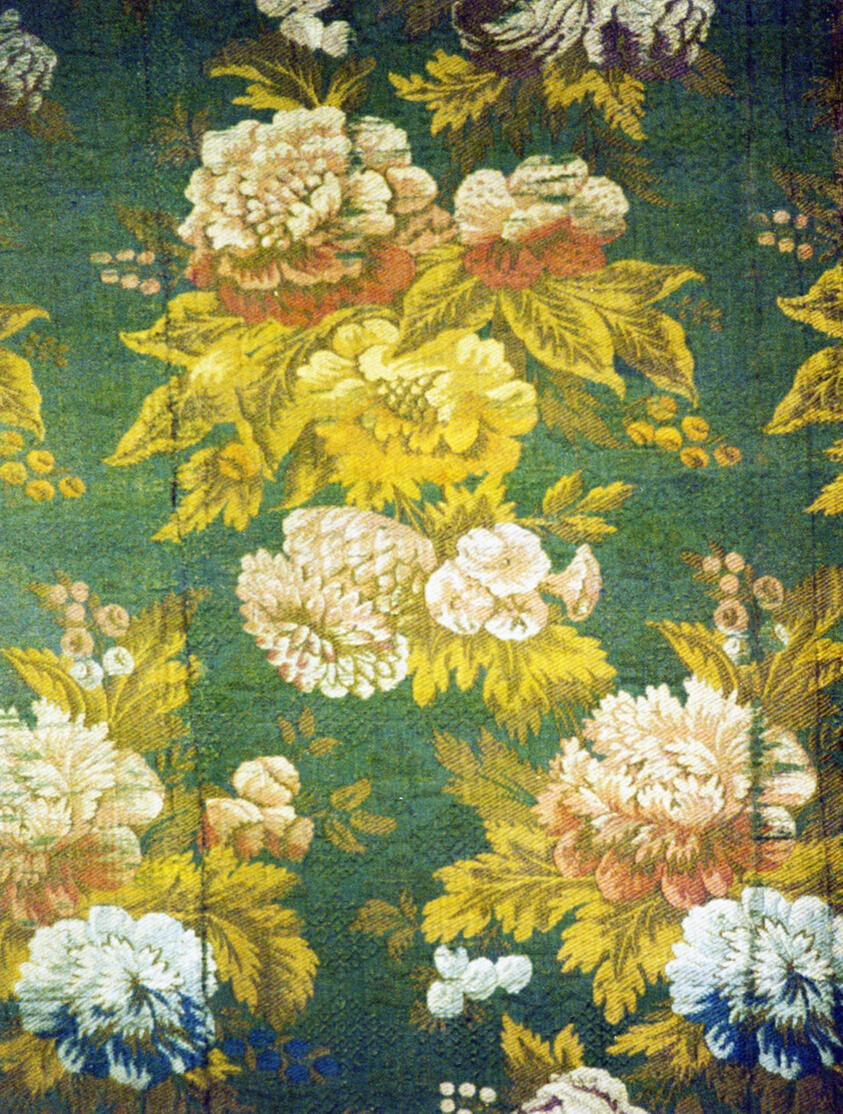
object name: Textile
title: Panel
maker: France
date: c. 1738/42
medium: Silk, plain weave with patterning warps and patterning and brocading wefts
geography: France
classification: textile; weaving